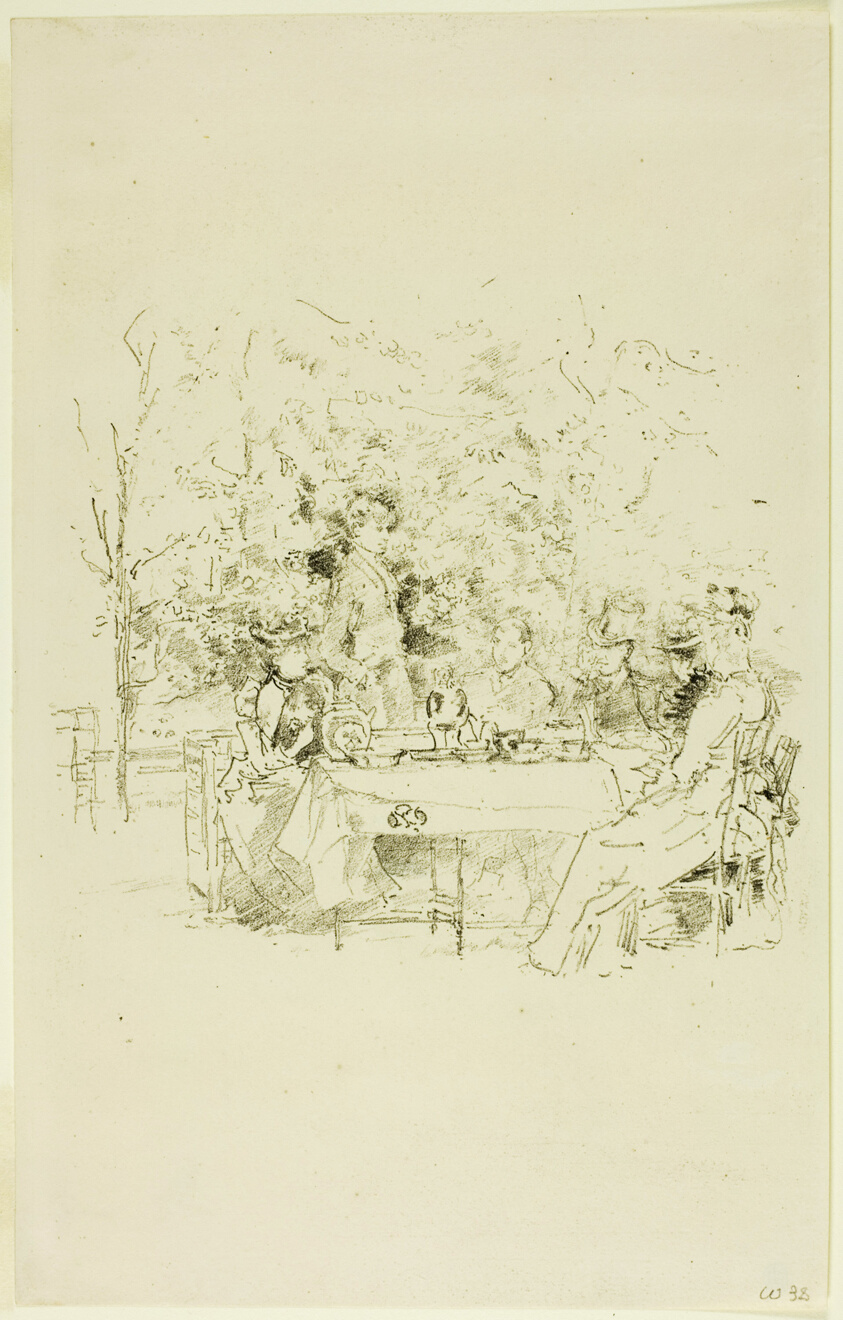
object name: Print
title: The Garden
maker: James McNeill Whistler (American, 1834-1903)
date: 1891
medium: Transfer lithograph in black on cream wove paper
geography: United States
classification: transfer lithograph; lithograph; print; prints and drawing; paper